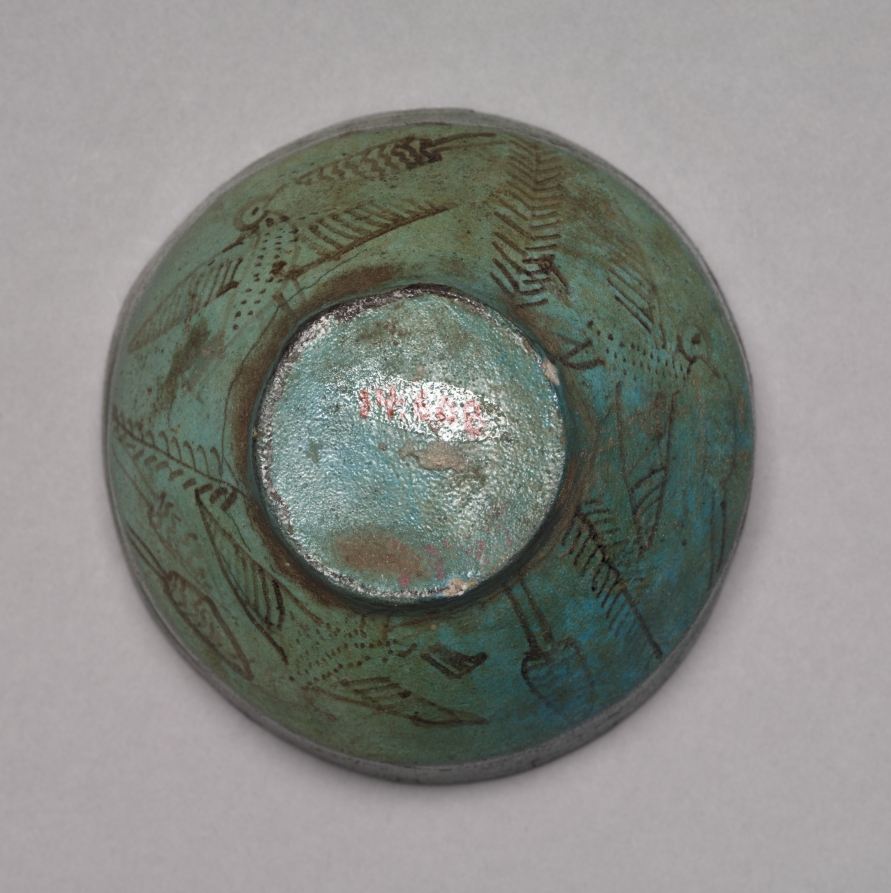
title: Decorated Bowl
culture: Egypt, Middle Kingdom (2040–1648 BCE)–New Kingdom (1540–1069 BCE)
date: 1980–1801 BCE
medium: turquoise faience with black painted decoration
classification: Vessels